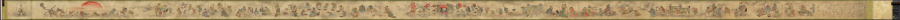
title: An Illustrated Marriage of Apparitions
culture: Japan, Edo period (1615–1868)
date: mid-1800s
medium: handscroll; ink and color on paper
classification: Painting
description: The matchmaking, engagement, wedding, and birth of the first child of two apparitions, or bakemono, literally "things that change," are illustrated in this whimsical, humorous handscroll. Japanese folklore abounds with such strange creatures, most famously represented in handscrolls featuring a procession of 100 supernatural monsters. Aside from a textual preface and cartouches indicating the content of the scenes, the tale is told visually. The artist and whereabouts of the original handscroll are unknown, but a number of other 19th-century copies by amateur painters exist in Japanese collections, attesting to its broad appeal.